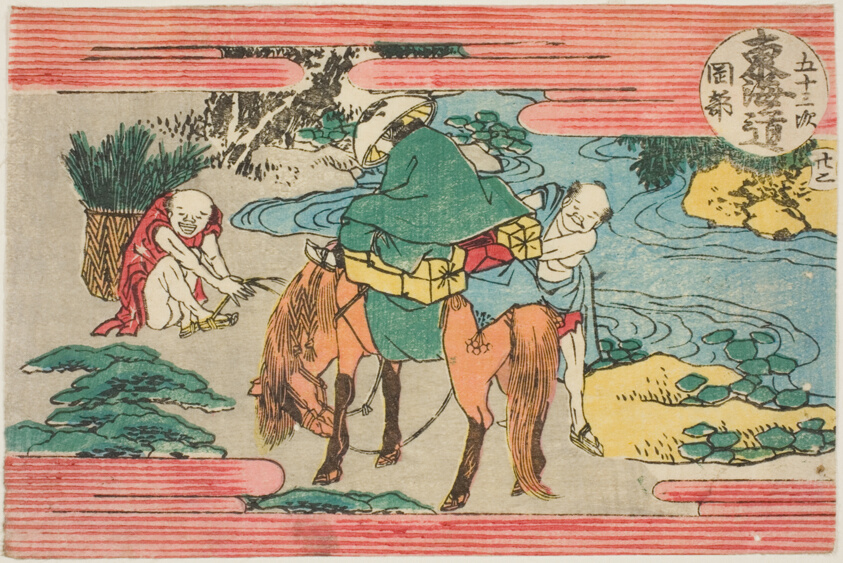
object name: Print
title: No. 22: Okabe, from the series "Fifty-three Stations of the Tokaido Road (Tokaido gojusan tsugi)"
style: Japanese (culture or style)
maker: Katsushika Hokusai 葛飾 北斎; Japanese, 1760-1849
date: c. 1805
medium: Color woodblock print; yotsugiriban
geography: Japan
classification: woodblock print; print; asian art